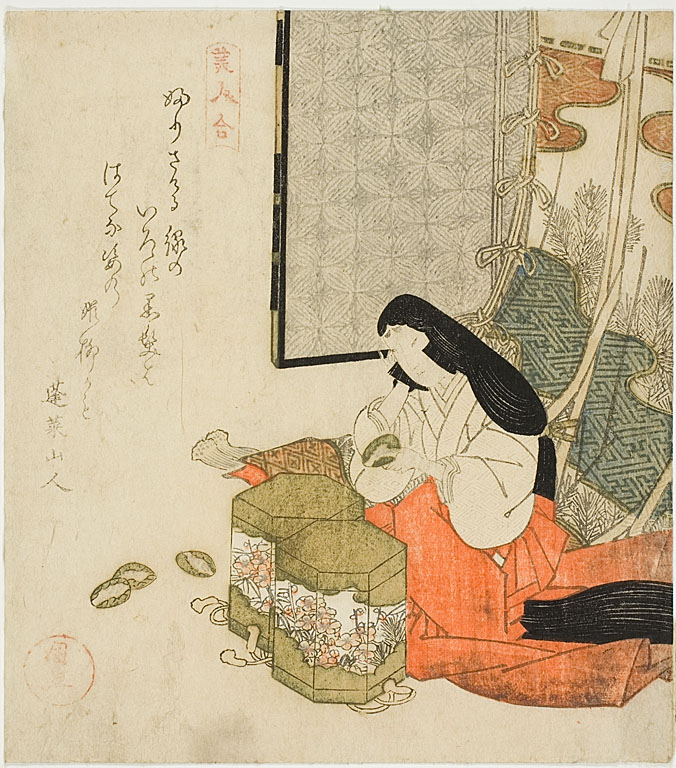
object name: Print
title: Court Lady Playing Shell Games (Kaiawase), from the series "Contest of Beauties (Bijin awase)"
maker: Utagawa Kuninao (Japanese, 1795–1854)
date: about 1820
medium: Color woodblock print; surimono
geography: Japan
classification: woodblock print; print; asian art